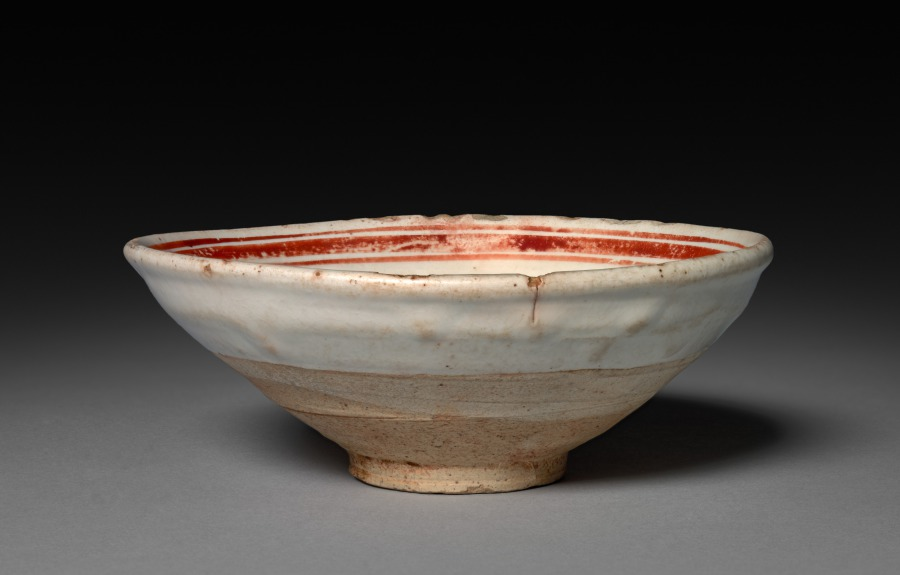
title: Cup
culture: China, Jin dynasty (1115-1234)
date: 1100s–1200s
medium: buff stoneware with underglaze slip application and overglaze enamel decoration, Cizhou ware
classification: Ceramic